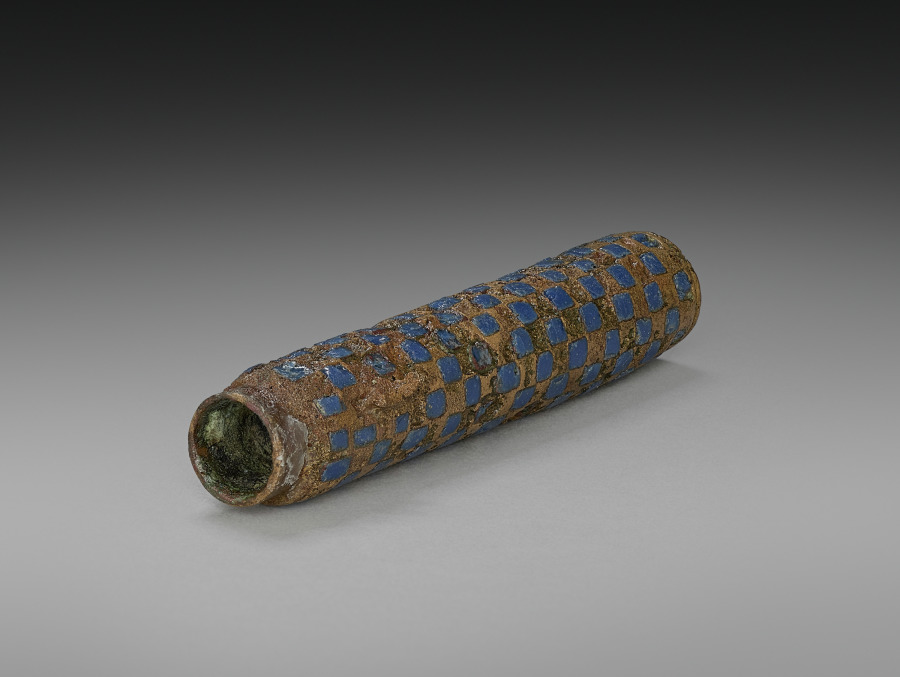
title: Kohl Tube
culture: Egypt, Greco-Roman period (332 BCE–395 CE), Ptolemaic dynasty (305–30 BCE)–Roman empire (30 BCE–395 CE)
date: 305 BCE–395 CE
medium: brass with blue enamel decoration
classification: Cosmetic Objects